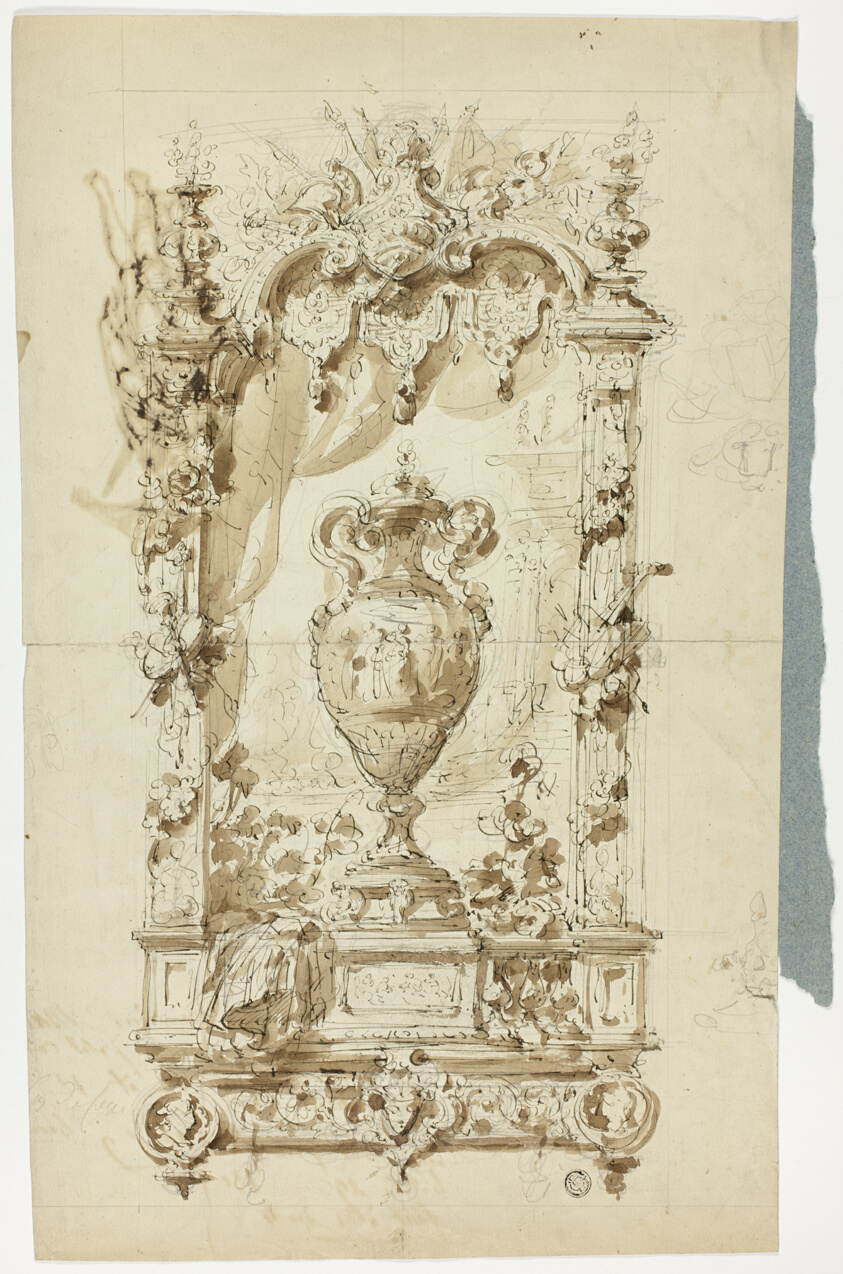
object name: Drawing and Watercolor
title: Monumental Vase in Ornamental Frame (recto); Sketch of Standing Man with Parasol and Parrot, and Architectural Studies (verso)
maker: Unknown Artist; French, 19th century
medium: Pen and brown ink and brush and brown wash, with graphite (recto), and pen and brown ink, with charcoal (verso), on cream wove paper, tipped onto blue wove paper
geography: France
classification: pen and ink drawings; brush and wash; paper; drawings (visual works); prints and drawing